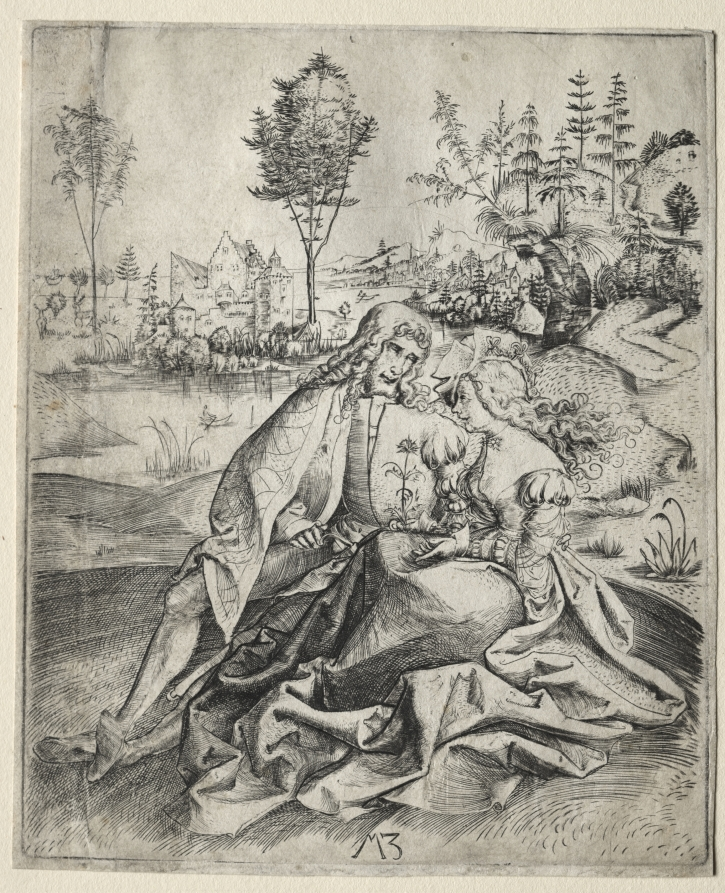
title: The Two Lovers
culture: Germany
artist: Master MZ (German)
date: 1500–03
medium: engraving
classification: Print